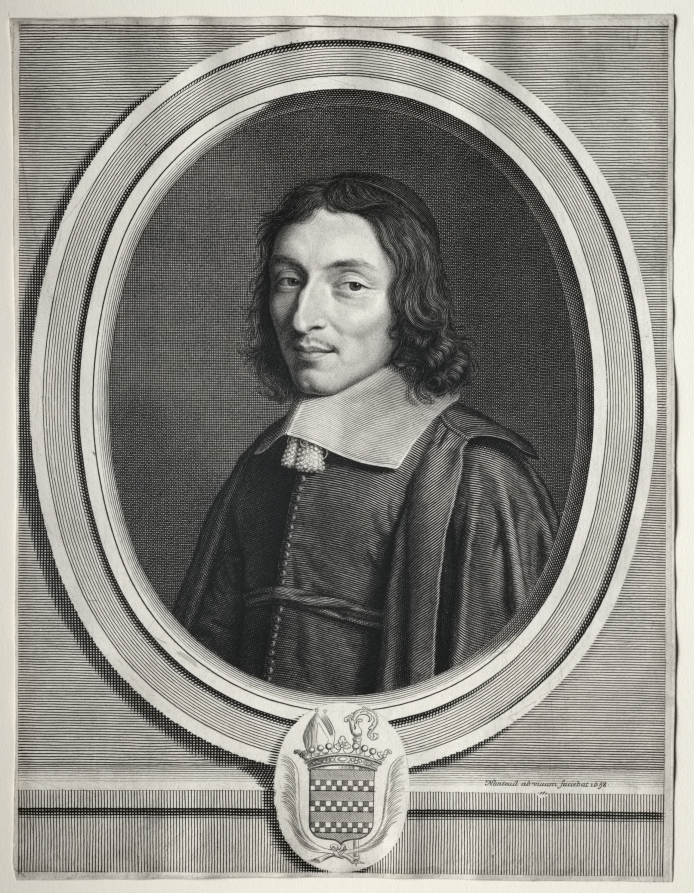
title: Cardinal de Coislin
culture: France, 17th century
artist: Robert Nanteuil (French, 1623–1678)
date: 1658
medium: engraving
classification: Print